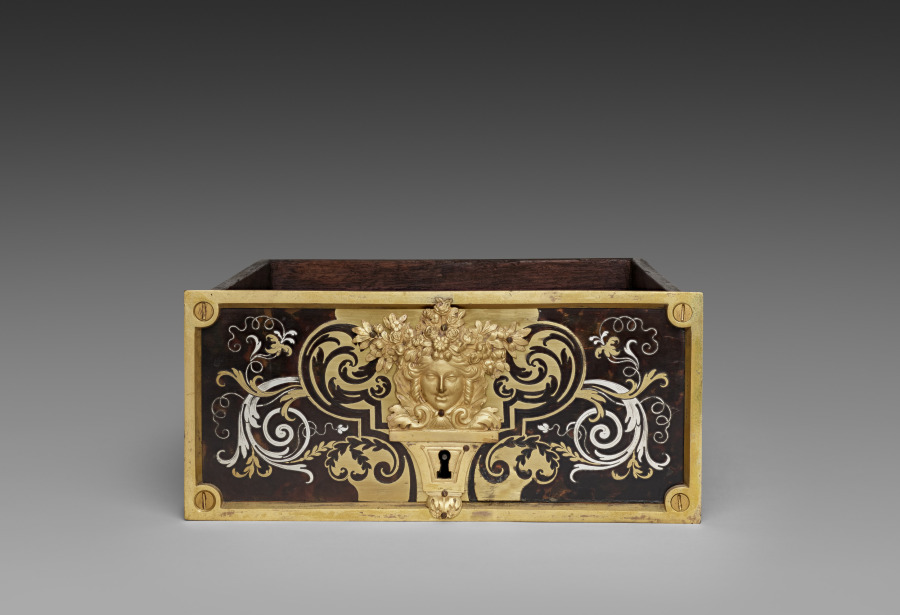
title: Side Drawer for Cabinet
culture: France, late 17th Century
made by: André-Charles Boulle (French, 1642–1732)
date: c. 1690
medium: ebony, marquetry in metal and tortoise shell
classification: Furniture and woodwork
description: Appointed cabinetmaker to King Louis XIV in 1672, André-Charles Boulle became a master of furniture making in France during the late 1600s until his death in 1732. Known primarily for his use of marquetry, in which metal patterns are inlaid into tortoiseshell then applied within the veneered surface of the furniture, Boulle established a level of quality and craftsmanship few others could achieve. As a result, his work found favor at the royal court and among other aristocrats and diplomats eager to impress the king. The inclusion of a medallion depicting Louis XIV within the bronze decoration of this chest would have identified the owner with the royal court. Often exhibiting stout architectural proportions with elegant groups of inlaid motifs such as the parrot on the central panel of this chest, Boulle’s designs are an example of the intellectual fashion for contrasting ideas, materials, and motifs.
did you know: Originally designed to sit atop an elaborate tall stand, this chest was likely altered in the late 1700s to reduce its scale and height.